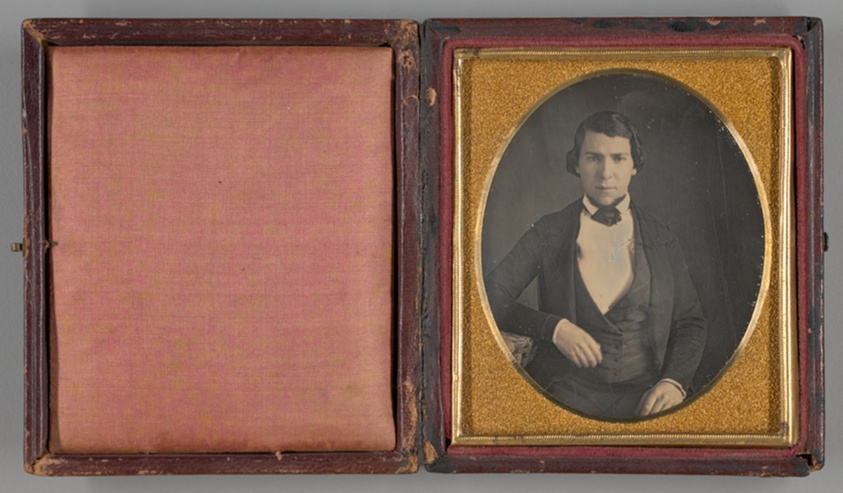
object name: Photograph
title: Untitled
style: 19th century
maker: Artist unknown; 19th century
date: 1839/60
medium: Daguerreotype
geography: Unknown Place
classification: daguerreotype; photographic process; photography; photograph